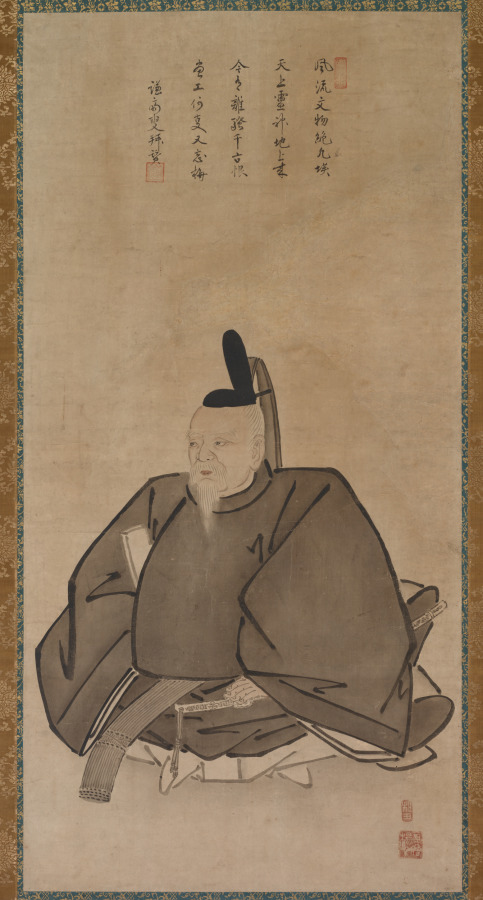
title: Portrait of Sugawara Michizane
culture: Japan, Muromachi period (1392–1573)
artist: Yōgetsu (Japanese, active late 1400s to early 1500s)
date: late 1400s–early 1500s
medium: hanging scroll; ink and color on paper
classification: Painting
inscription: four-line inscription signed "Sakugen Shūryō" (1501-1579) accompanied by two seals unread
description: Sugawara Michizane (845–903) was a Kyoto aristocrat who died in exile in Dazaifu in Japan’s southern island of Kyushu, having been slandered at court. His vengeful spirit was later pacified by the construction of shrines in his name. His image was incorporated into the repertoire of Zen Buddhist figure painting, which included bodhisattvas, Daoist immortals, and other enlightened beings. Eminent monk Sakugen Shūryō (1501–1579) inscribed this work, which was painted by monk-painter Yōgetsu of Kyushu, who traveled east to study either in Kyoto or Kamakura. The Chinese-style poem is an ode to Michizane in his guise as the deity Tenjin.